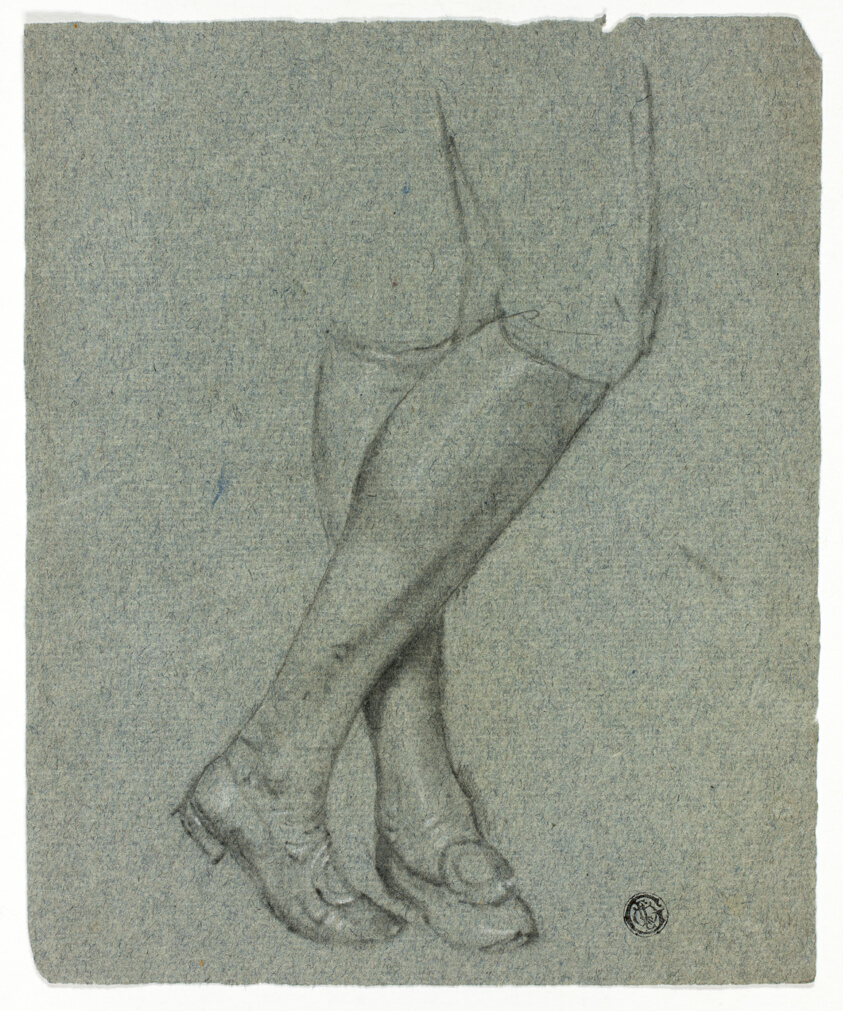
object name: Drawing and Watercolor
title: Crossed Legs of Standing Figure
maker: John Downman (English, 1750-1824)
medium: Charcoal, heightened with white chalk, on blue laid paper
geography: England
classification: charcoal; drawings (visual works); prints and drawing; paper